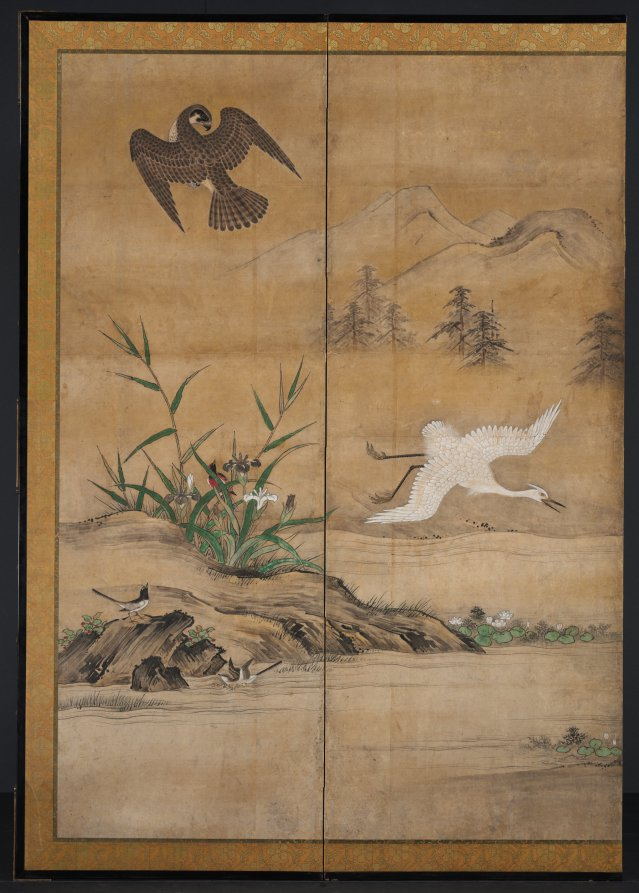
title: Birds and Flowers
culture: Japan, Momoyama period (1573–1615)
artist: attributed to Kano Shōei (Japanese, 1519–1592)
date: late 1500s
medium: One of a pair of six-panel folding screens; ink, color, and gold on paper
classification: Painting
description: The landscape depicted in this pair of screens follows a seasonal progression from right to left, starting with the blossoming plum of early spring and ending with late autumn peonies. A variety of smaller birds are positioned throughout the scene, and a trio of swimming ducks is bracketed by early summer irises and early autumn bellflowers at the center. While some raptors (birds of prey) terrorize a pheasant and an egret (a waterfowl) to the right, a peacock and peahen converse to the left. Hawks are associated with military prowess, while the peafowl suggest cultural prestige.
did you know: Military class patrons frequently requested scenes depicting predation, such as hunting scenes that were inserted as additional subject matter in otherwise tranquil vistas celebrating flora and fauna.